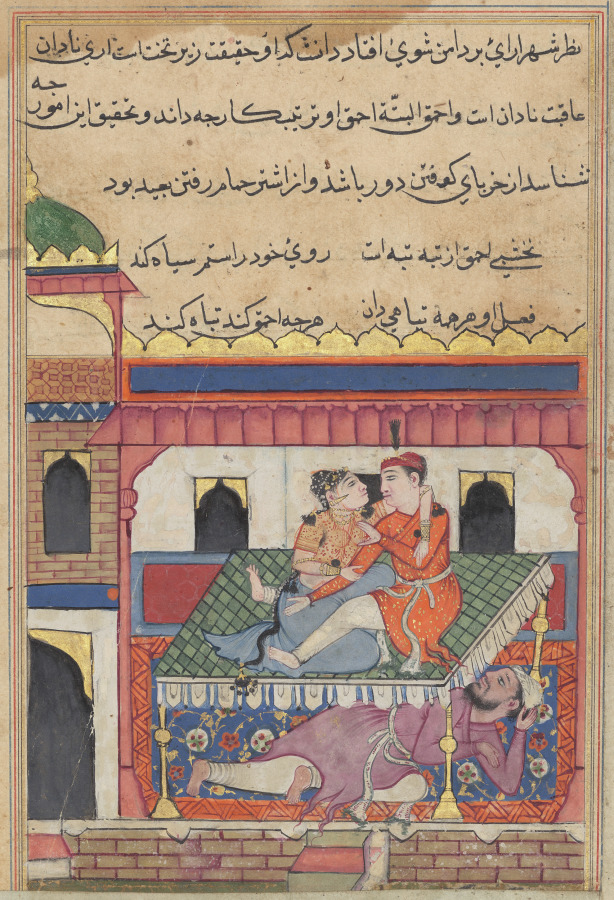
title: Shahr-Arai and her lover dallying on a bed beneath which is concealed her husband, from a Tuti-nama (Tales of a Parrot): Fortieth Night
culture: Mughal India, court of Akbar (reigned 1556–1605)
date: c. 1560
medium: gum tempera, ink, and gold on paper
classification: Painting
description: Shahr-Arai’s husband hides under his wife’s bed in an attempt to catch her in a love affair. Despite his precautions, the ends of his purple robe peek out from beneath the bed. When Shahr-Arai sees this, she quickly concocts a plan to trick her husband and protect her lover.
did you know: Shahr-Arai loudly proclaims that her lover is an adopted brother who will protect the husband’s life.